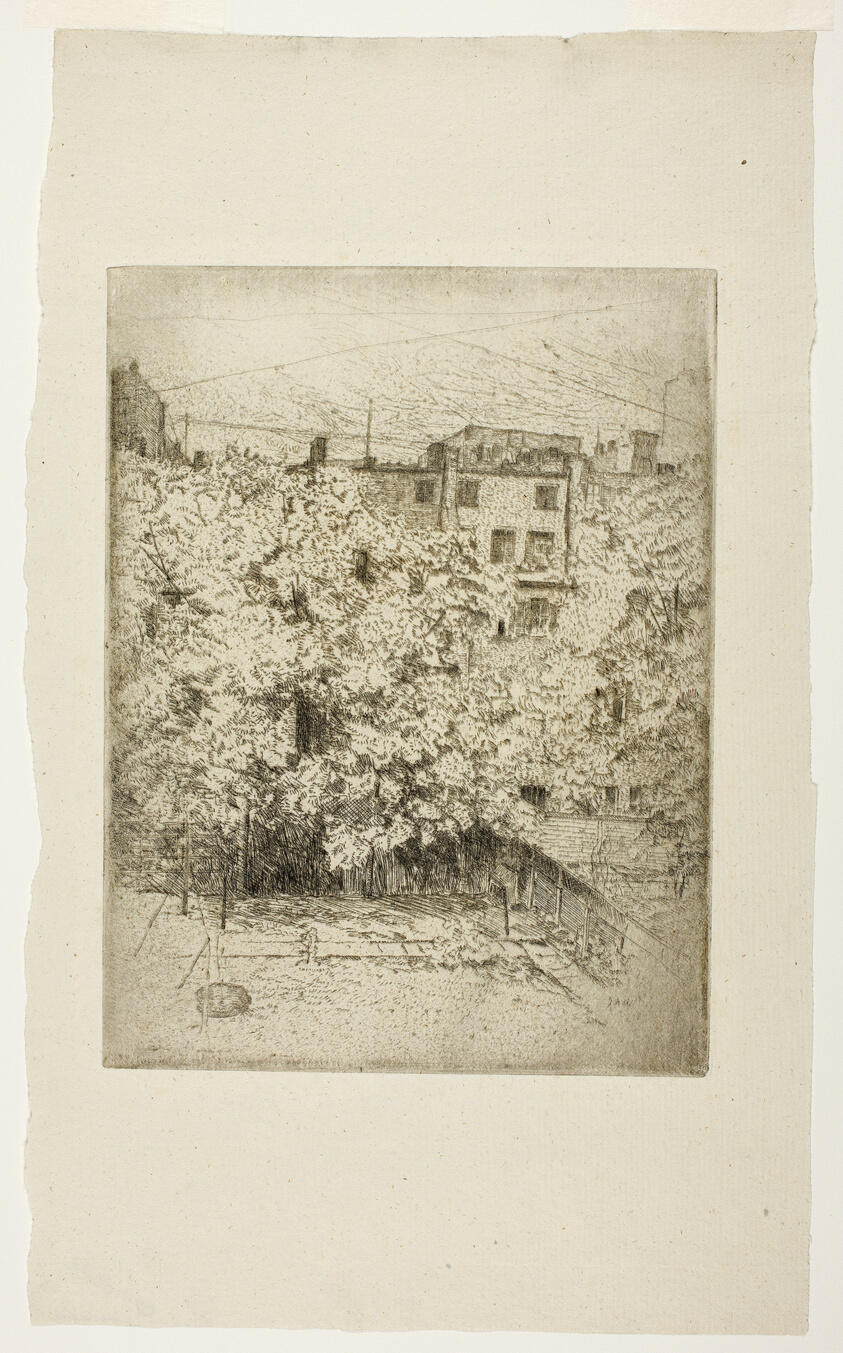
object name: Print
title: My Back Yard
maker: Julian Alden Weir (American, 1852-1919)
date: 1890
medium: Etching on paper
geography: United States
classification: etching; print; prints and drawing